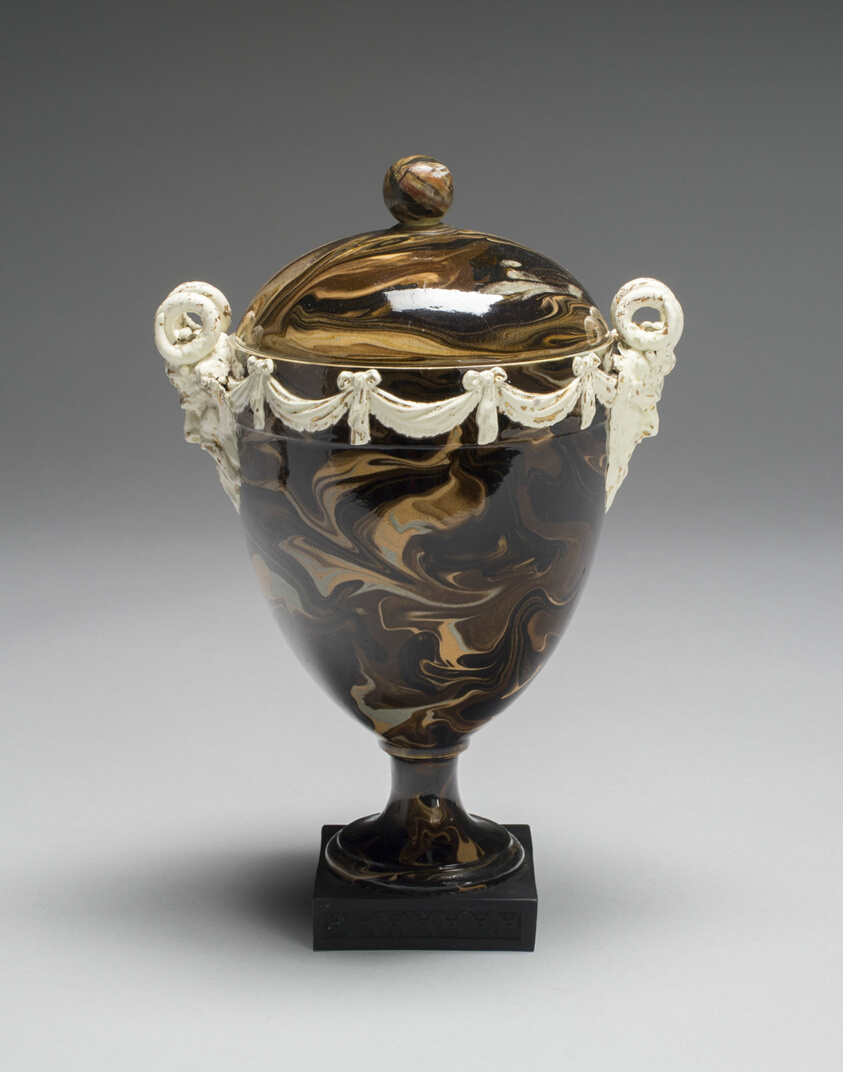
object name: Ceramics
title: Vase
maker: Wedgwood Manufactory; England, founded 1759; Etruria, Staffordshire, England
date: c. 1770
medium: Earthenware (surface agateware)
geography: Burslem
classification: vase; vessel; ornamental piece; stoneware; european decorative arts; ceramics